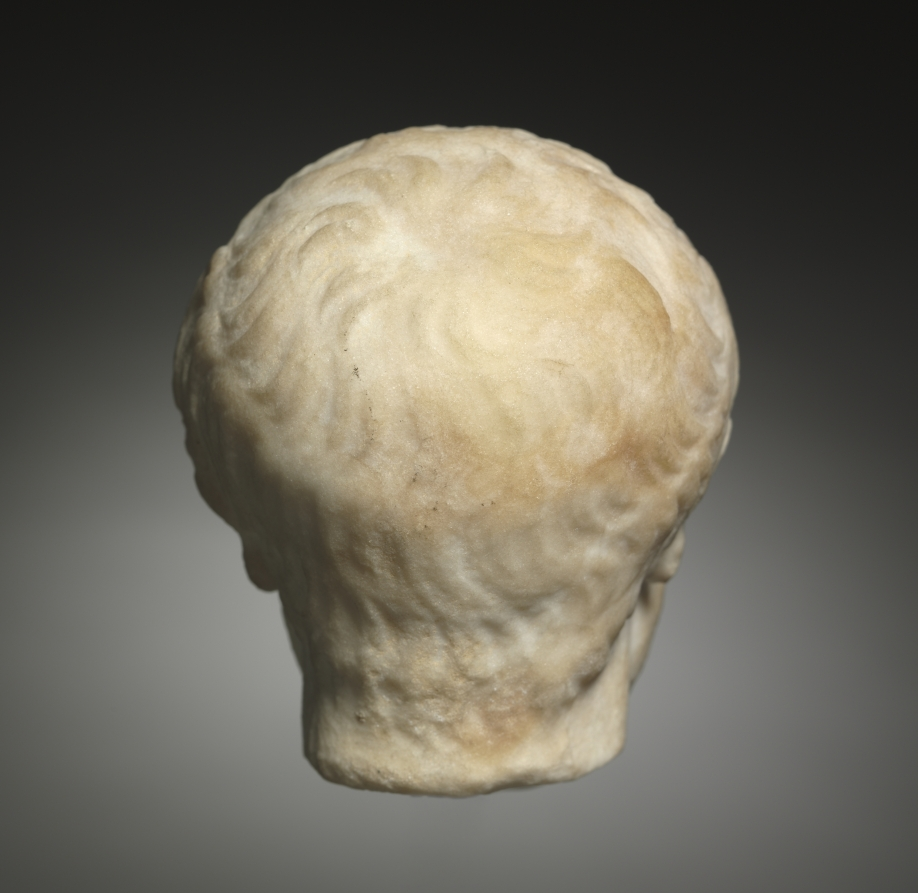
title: Head of Trajan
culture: Italy, Roman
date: 100–200 CE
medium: marble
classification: Sculpture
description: Though this portrait head has many of the features associated with the emperor Trajan, such as his short, comma-shaped forelocks, other aspects of the statue are unusual. For example, all other known portraits of Trajan depict him as clean shaven, but this one appears to have facial hair. Provincial portraits—that is, those made outside of Italy—could sometimes differ dramatically from imperial standards. This head may be an example of provincial experimentation.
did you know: Drilled pupils only began appearing on Roman portrait statues after Trajan’s death in 117 CE; their appearance here could be a later addition.